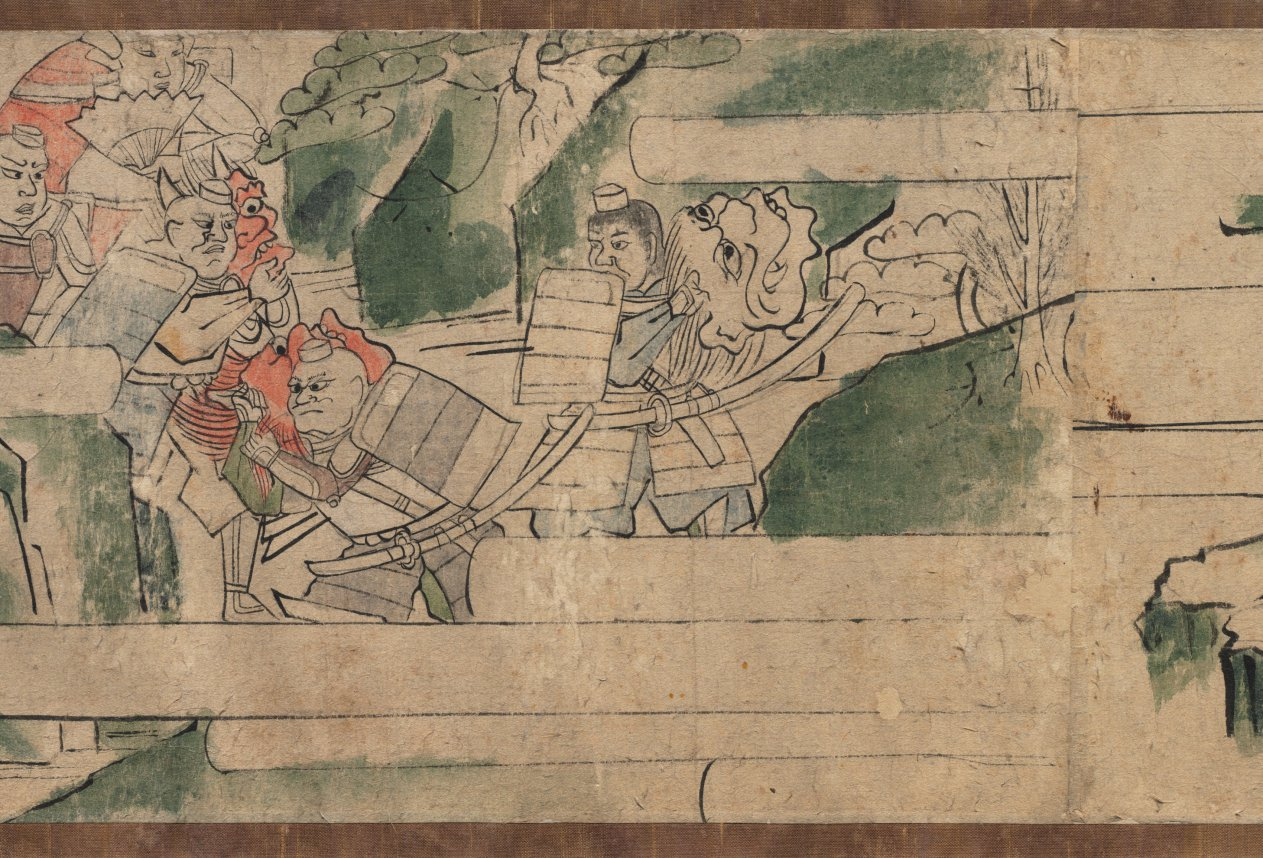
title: Oeyama Engi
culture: Japan, Edo period (1615–1868)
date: 1615–1868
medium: one of a pair of handscrolls; ink and color on paper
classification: Painting